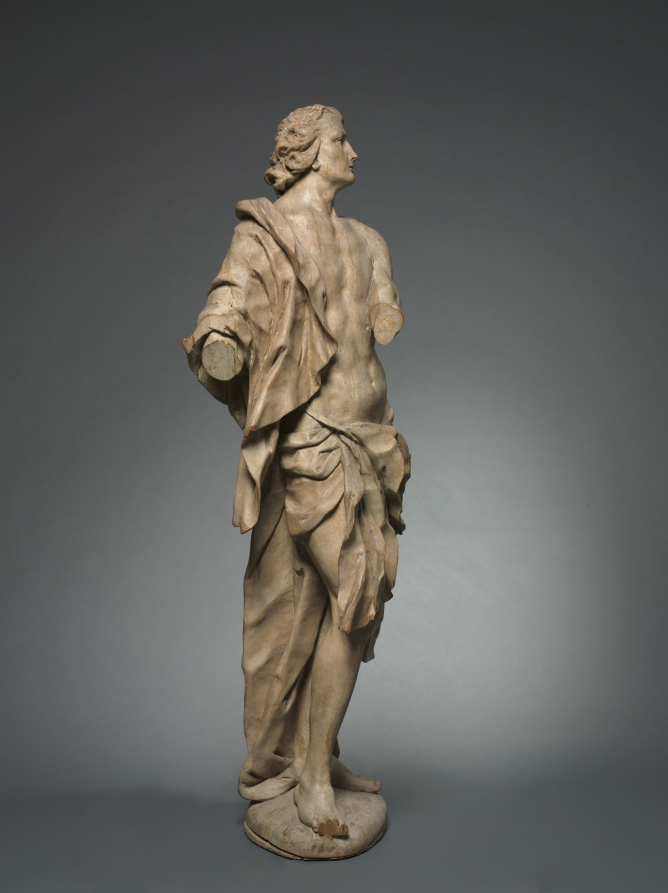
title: A Saint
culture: Germany or Austria, 18th century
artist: follower of Diego Francesco Carlone (Italian, 1674–1750)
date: c. 1730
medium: wood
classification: Sculpture